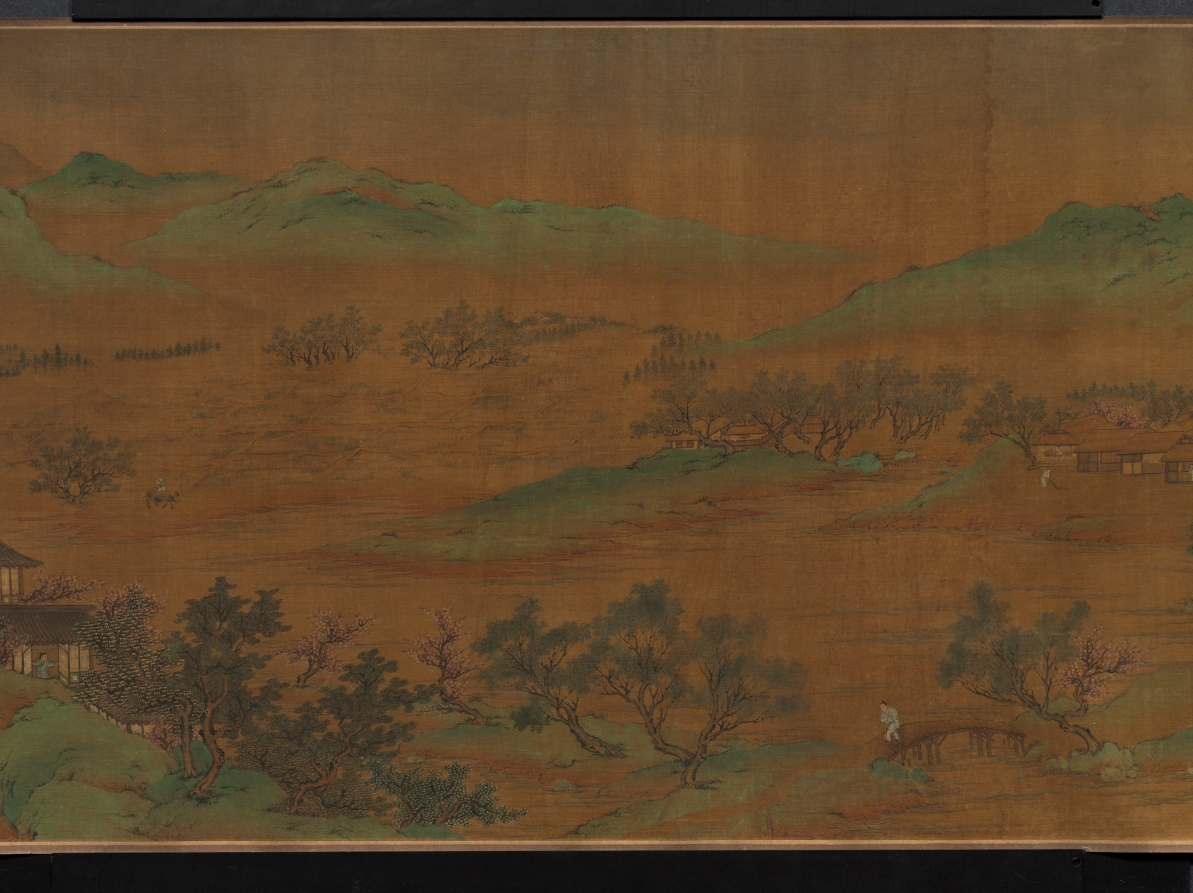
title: Landscape, The Palace of the Clouds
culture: China, Qing dynasty (1644-1911)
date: 1644–1911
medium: handscroll, ink on silk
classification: Painting